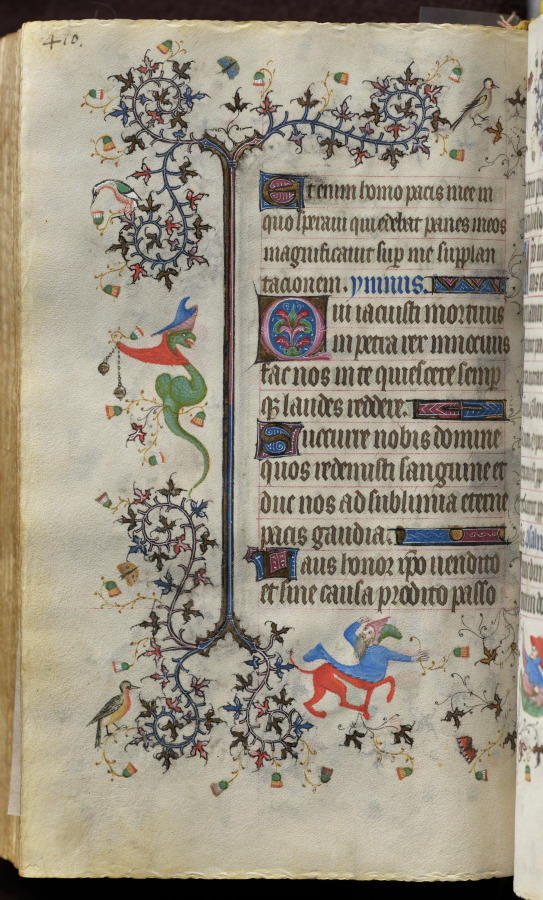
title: Hours of Charles the Noble, King of Navarre (1361-1425): fol. 199v, Text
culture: France, Paris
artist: Master of the Brussels Initials and Associates (French)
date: c. 1405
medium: ink, tempera, and gold on vellum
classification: Bound Volume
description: This precious volume was obviously highly prized by its owner, the French-born King of Navarre, who had his coat of arms painted on no less than twenty folios. Rather than directly commissioning this manuscript from a specific workshop, it seems that Charles the Noble acquired his book of hours -- perhaps ready-made for the luxury market -- while on a trip to Paris in 1404-05. A collaborative effort, six painting styles are evidenced within the pages of this codex, those of two Italians, two Frenchmen, and two Netherlanders. The painter who was responsible for the planning and decoration of the book, and who produced seventeen of the large miniatures, was a Bolognese artist known as the Master of the Brussels Initials. His principal assistant, responsible for most of the borders, was a Florentine who signed his name "Zecho" da Firenze on folio 208 verso.